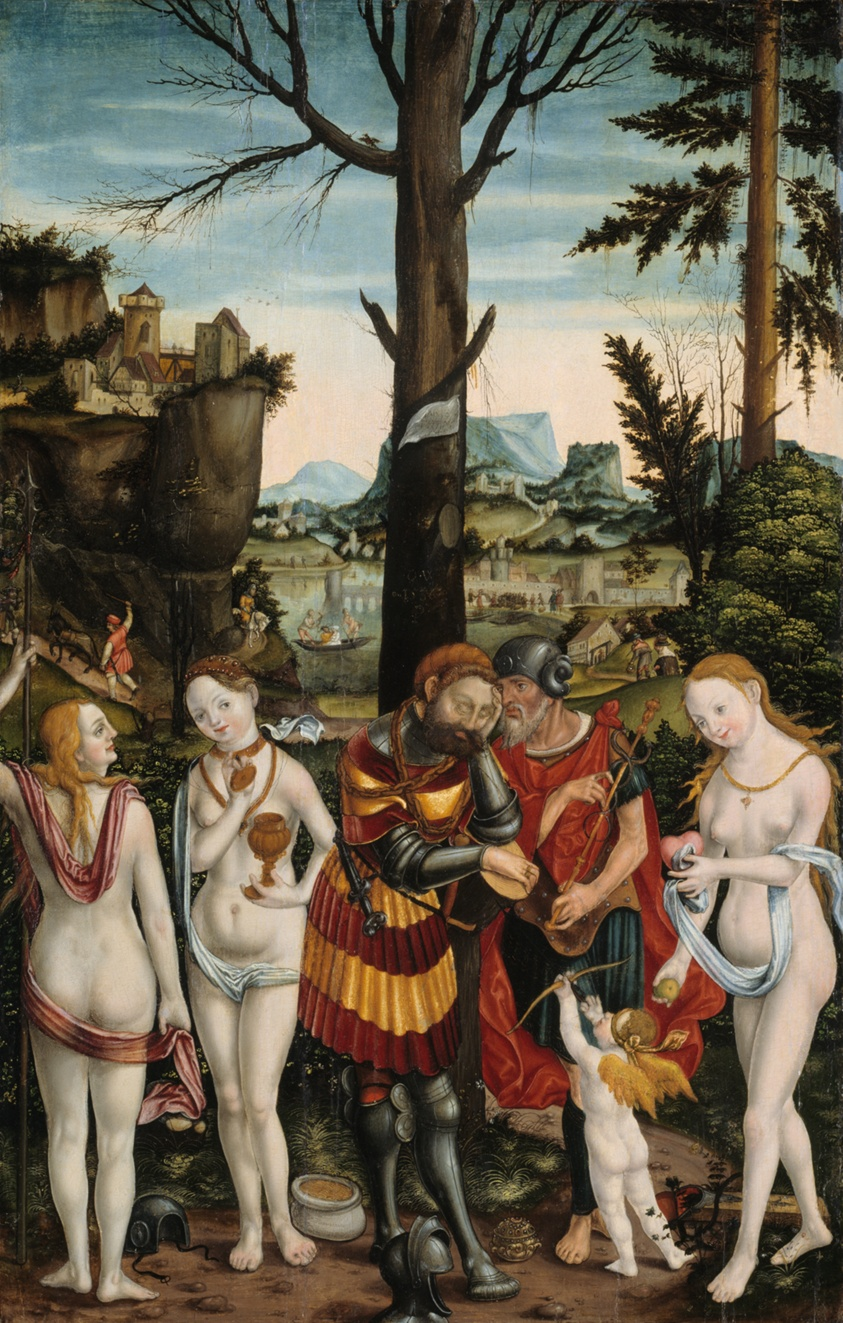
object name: Painting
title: The Dream of Paris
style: 16th Century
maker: Monogrammist PG (Germany, active c. 1525–50)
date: 1536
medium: Oil on panel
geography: Germany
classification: painting; oil on panel; paint; european painting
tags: mythology, boatman, boats, water, figures, figure, nudes, landscape, knights, goddesses, Greece, Century of Progress, world's fairs, Chicago World's Fairs